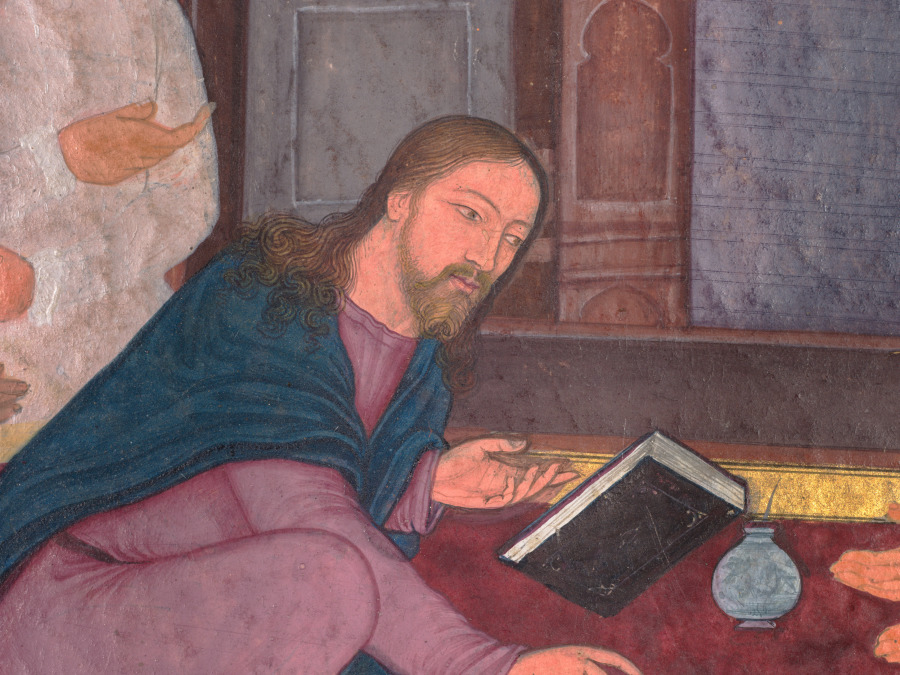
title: Jesus writes on the ground (folio 130 verso), from a Mirror of Holiness (Mir’at al-quds) of Father Jerome Xavier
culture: Mughal India, Allahabad, made for Prince Salim (1569–1627)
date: 1602–4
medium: Gum tempera, ink, color, and gold on paper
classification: Manuscript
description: As Jesus was debating with the scribes and Pharisees in Jerusalem, they brought before him an adulterous woman. Hoping to incite him to violence, they declared that if Jesus followed the law of Moses, he should order her to be stoned to death. Jesus responded, “Let whichever of you is without sin cast the first stone.” Then he began to write with his finger on the ground, and each of the men saw a description of his own sins. The two men in the bottom corner of the painting clutch stones with expressions of doubt, fear, and disgust. The adulteress in the red dress holds out her hands in supplication.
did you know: The adulteress wears a red dress, gold rings, and a necklace under her stole.